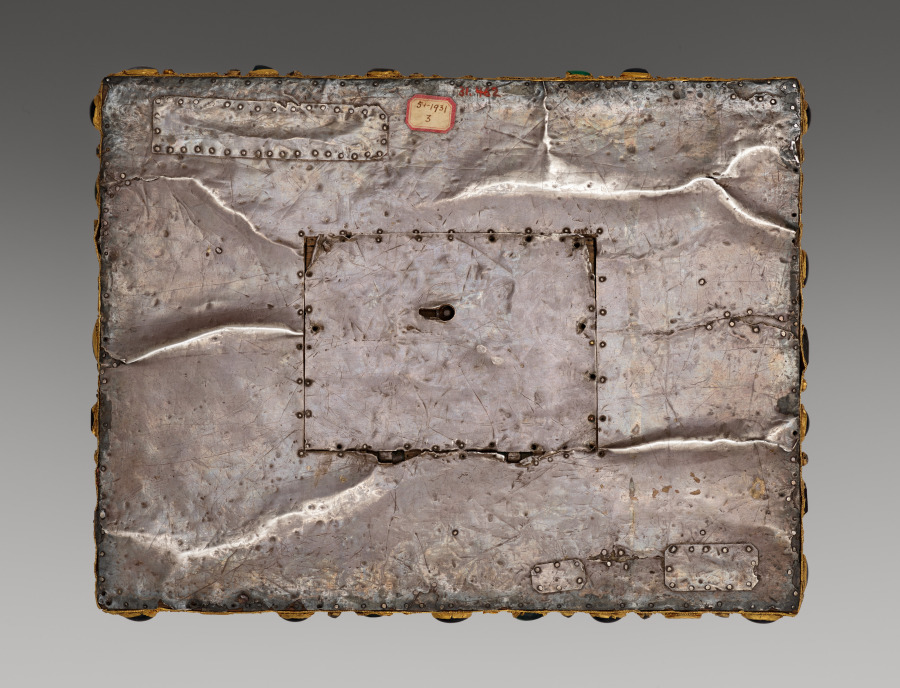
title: Portable Altar of Countess Gertrude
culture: Germany, Lower Saxony?, Romanesque period, 11th century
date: c. 1045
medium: gold, cloisonné enamel, porphyry, gems, pearls, niello, wood core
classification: Metalwork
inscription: GERDRVDIS XPO FELIX VT | VIVAT IN IPSO OBTVLIT HVNC LAPIDEM GEMMIS | AVROQ NITENTEM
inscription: SIGISMVNDVS, CONSTANTIVS, SANCTA CRVX, SCA ELENA, SCA ADALHEIT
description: Commissioned by Countess Gertrude of Brunswick, this portable altar is one of the Guelph Treasure’s earliest and most sumptuous objects. The choice of white-speckled porphyry as the altar stone signals Gertrude’s worldly aspirations; an imperial color since classical antiquity, porphyry was only used by the imperial family. Historical figures of royal and imperial rank are depicted with Christ, the Virgin, apostles, and archangels along the altar’s sides, stressing the countess’s political ambitions and claim of imperial lineage for her own dynasty. The Latin inscription surrounding the altar stone reads, "Gertrude offers to Christ, to live joyfully in him, this stone that glistens with gems and gold."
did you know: On the bottom of this altar is a trap door that opened to reveal small relics of saints wrapped in silk.